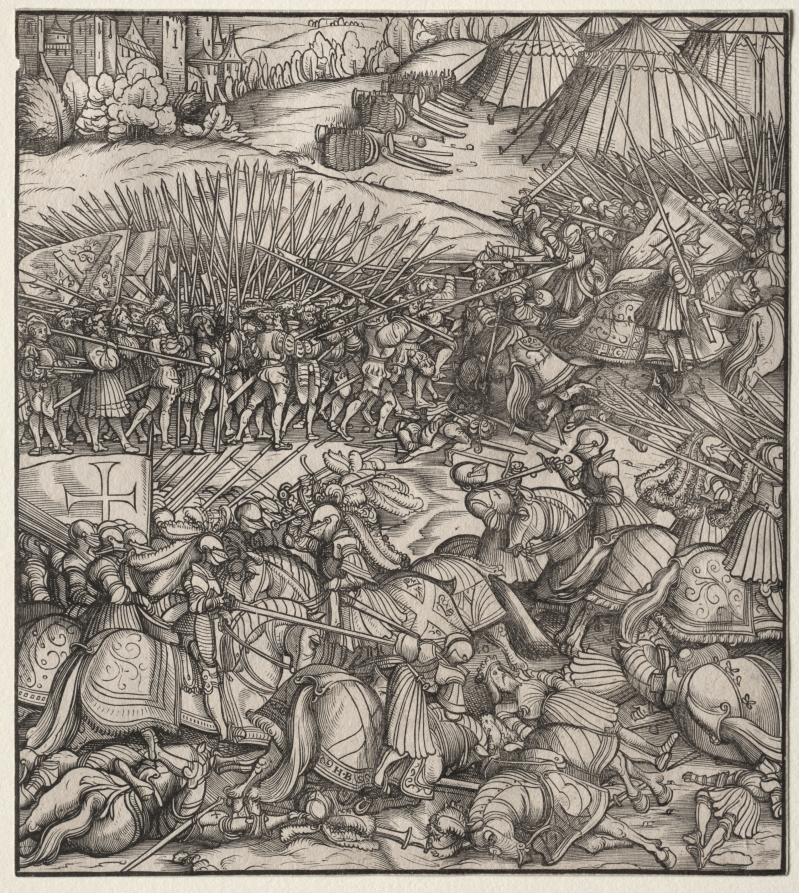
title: How the French King made war on the King of Feuereisen in his realm and how the King of Feuereisen died in the battle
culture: Germany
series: Der Weisskunig (The White King)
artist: Hans Burgkmair (German, 1473–1531)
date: 1512–16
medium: woodcut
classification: Print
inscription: lower center, in block: H·B ; VERSO, lower left, in graphite: Liechtenstein [fr.?] 104 / No. 52 ; lower left, in graphite: [illegible] ; lower right, in graphite: 07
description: The Battle of Nancy on January 7, 1477, between the forces of the king of France (Louis XI) and the king of Feuereisen (Charles the Bold, Duke of Burgundy) involved early artillery, visible in the distant background. The heavily armored cavalry fight with lances and swords. Of particular interest is the unarmored infantry's use of the pike, a long, small-headed spear, as a lethal hedge against cavalry charges.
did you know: Throughout the 1200s, the French relied on heavy cavalry as the mainstay of mounted shock combat, a military development that shifted the focus from the axe-wielding infantry man to the heavily armored, lance-carrying knight.